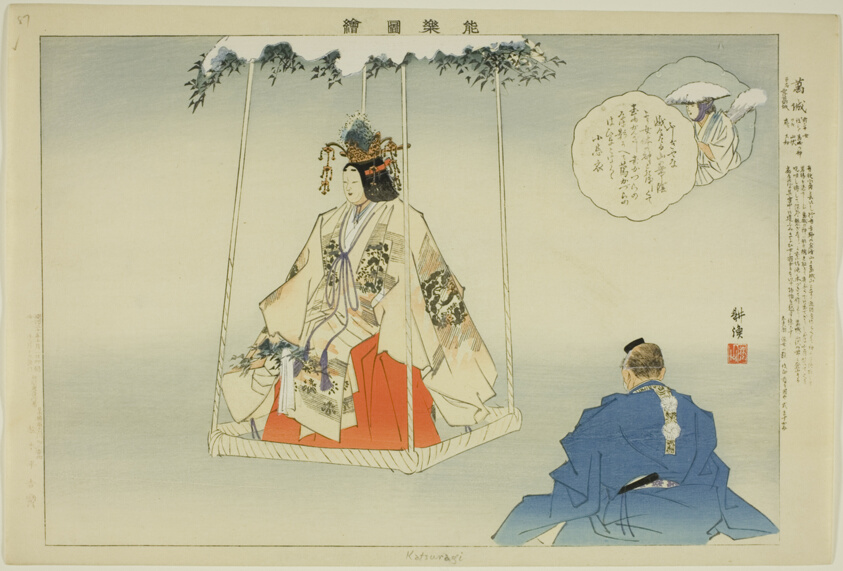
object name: Print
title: Kazuraki, from the series "Pictures of No Performances (Nogaku Zue)"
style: Japanese (culture or style)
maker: Tsukioka Kogyo; Japanese, 1869-1927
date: 1898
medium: Color woodblock print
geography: Japan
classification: woodblock print; print; asian art